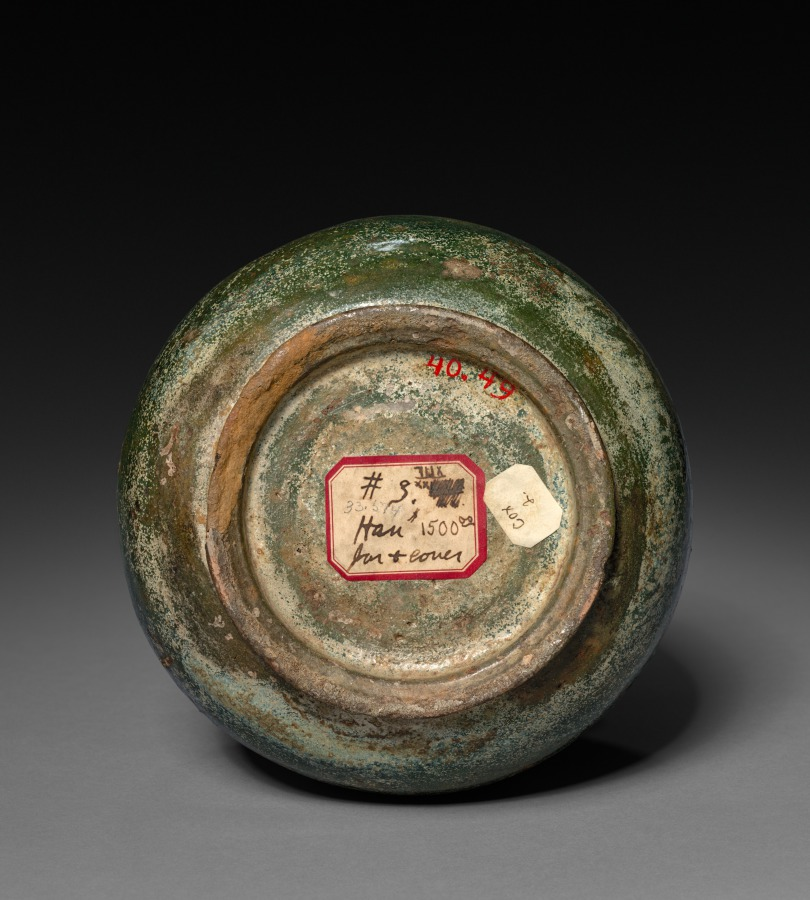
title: Jar with Cover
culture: China, Han dynasty (202 BCE–220 CE)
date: 206 BCE–220 CE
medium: glazed earthenware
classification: Ceramic